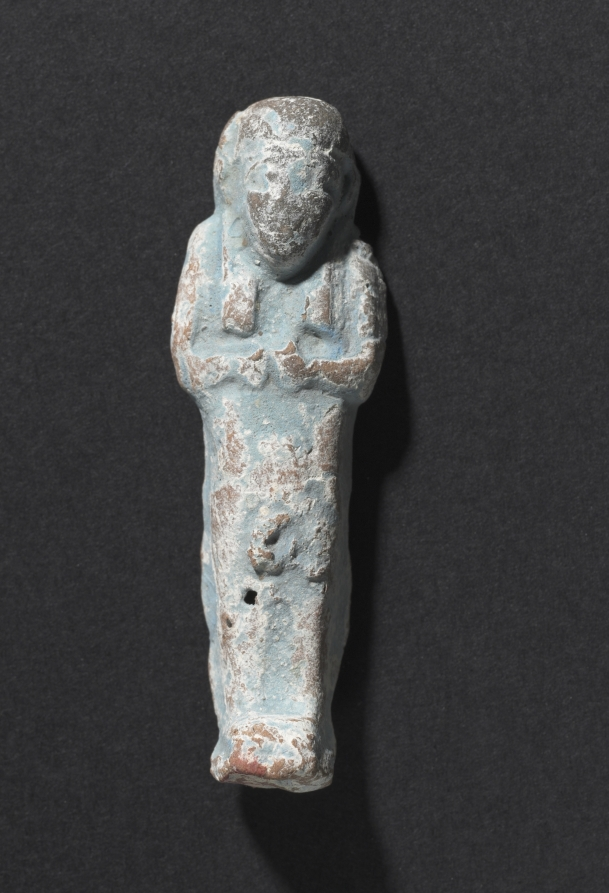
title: Shawabty of Ditamenpaankh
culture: Egypt, Late period (715–332 BCE), Dynasty 25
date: 715–656 BCE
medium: terracotta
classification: Funerary Equipment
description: High demand for shawabtys in the Late Period, a time when as many as 400 or more shawabtys were placed in the tomb with the deceased, gave rise to a specialized container for storing them: the shawabty box. This example is inscribed for the lady of the house, Ditamenpaankh, and was probably one of a pair originally made for her. The single-masted boat on the box's lid is perhaps an allusion to the pilgrimage of the deceased to the holy city of Abydos, the cult city of Osiris, king of the dead. The shawabtys inside are crude, mass-produced examples cast in an open mold. Made of terracotta, their blue paint imitates more costly shawabtys made of faience. As for the shawabty spell, it has been removed from its traditional location on the shawabty's front and relocated onto the sides of box, where it needed only to be written once, thus expediting production.